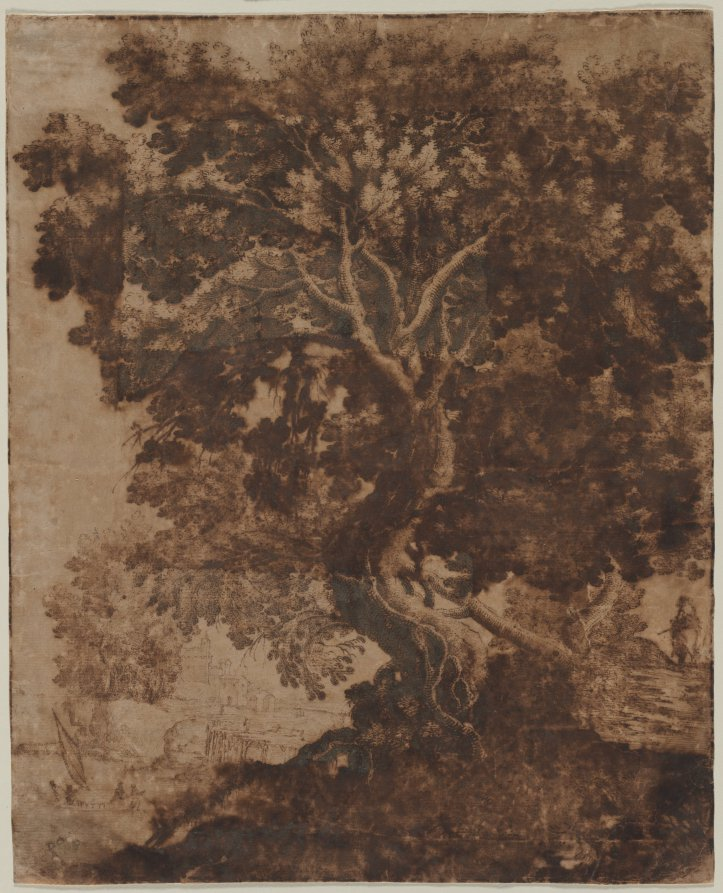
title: Tree in a Landscape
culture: Italy, 17th century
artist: Ercole Bazicaluva (Italian, c. 1610–1661)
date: mid-1600s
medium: pen and brown ink; framing lines in brown ink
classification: Drawing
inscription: lower left, in brown ink: DO / CA MP [M abraded] / [illegible]6 ; VERSO (visible through transmitted light), lower center, in brown ink: [illegible] ; VERSO OF SECONDARY SUPPORT (now removed, recorded in a photograph), upper right, in blue pencil(?): #25 [illegible, masked] ; center, in white paint: 41 ; center, in black crayon(?): 4 ; center right, in graphite(?): Barbarelli ; lower center, in graphite(?): 149